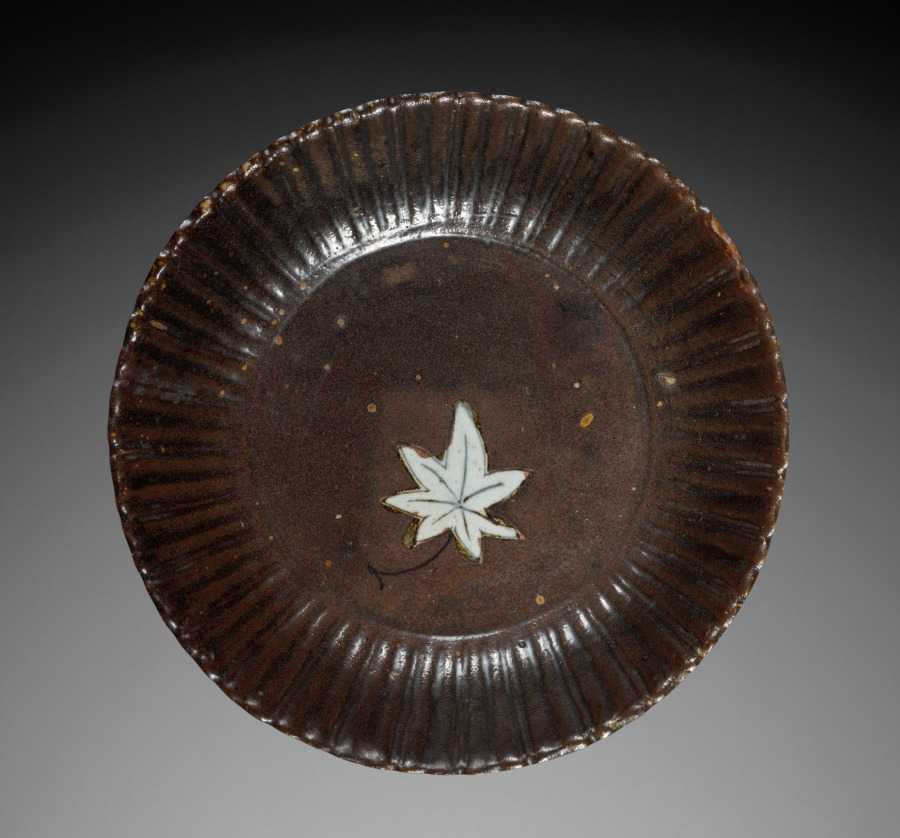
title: Dish with Maple Leaf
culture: Japan, Edo period (1615–1868)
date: 1650–99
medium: porcelain with underglaze blue and iron glaze (Hizen ware, Suisaka type)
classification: Ceramic